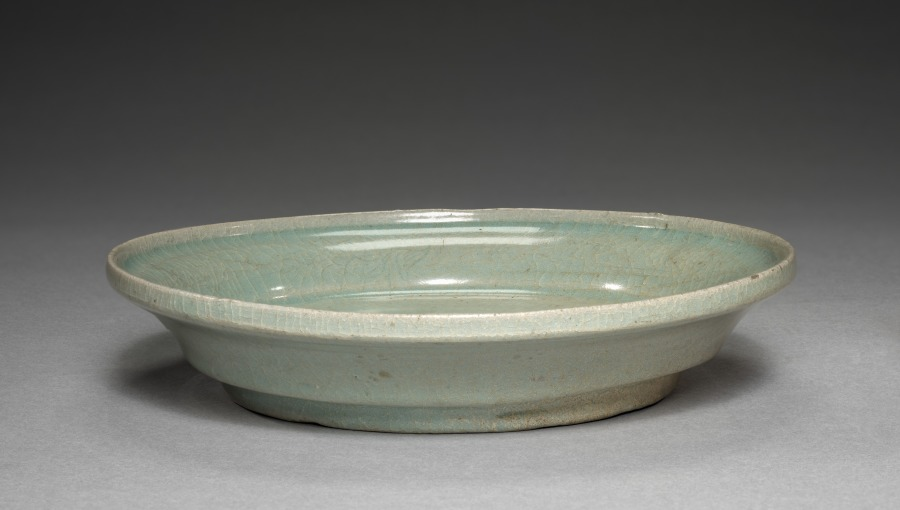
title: Saucer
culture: Korea, Goryeo dynasty (918–1392)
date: 1100s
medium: pottery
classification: Ceramic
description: As early as the seventh century, the practice of drinking tea and wine became an important part of elite culture in Korea. Elites of the Goryeo period commissioned a variety of types of utensils and vessels including this saucer paired with a large bowl, to make their drinking experience more exciting.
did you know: The crackle pattern that appears all over this saucer was caused by a thermal expansion mismatch between the body and the glaze.